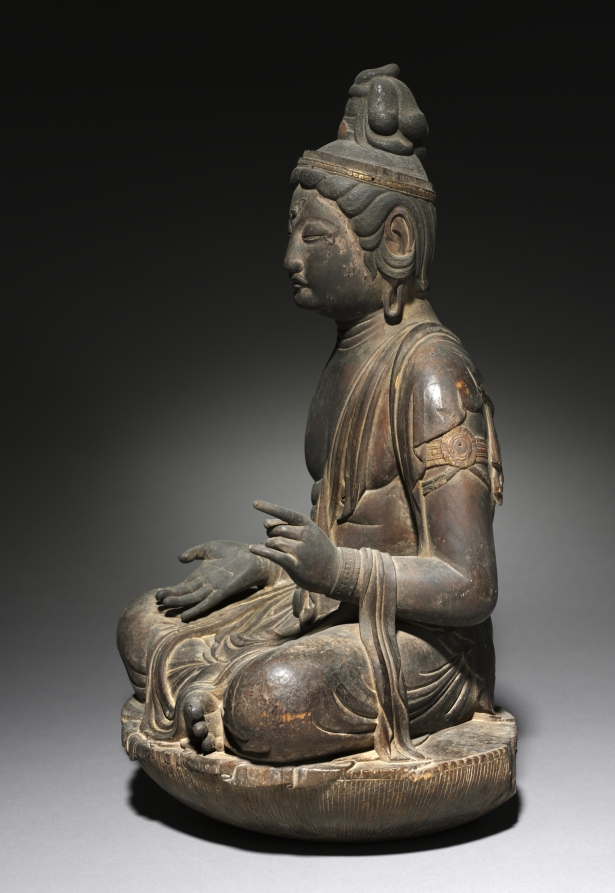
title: Sun Bodhisattva (Nikkō Bosatsu)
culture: Japan, Heian period (794–1185)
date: c. 800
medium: Japanese nutmeg-yew wood with traces of color and gold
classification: Sculpture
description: Bodhisattvas are beings who have attained enlightenment but delay entry into Buddhahood until they have fulfilled their varied vows to aid others along the path to enlightenment. The flowing robes and curving posture of this figure were inspired by Chinese Buddhist sculpture. However, the interplay of the wood grain in this single block of yew with the artist’s subtle carving is a Japanese innovation. Originally paired with the Moon Bodhisattva (Gekkō Bosatsu), this figure likely flanked a sculpture of the Medicine Master Buddha (Yakushi Nyorai).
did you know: Japanese nutmeg-yew, or kaya, was used as a replacement for the unobtainable sandalwood of which small Buddhist sculptures imported from China were made.